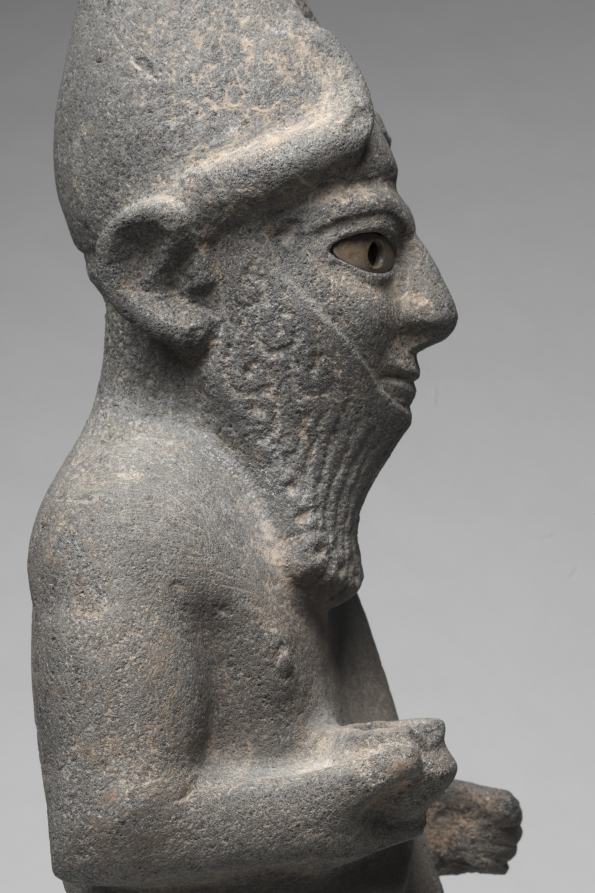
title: Priest-King or Deity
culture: Hittite, North Syria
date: c. 1600 BCE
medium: basalt with bone eyes (left, ancient; right, restored)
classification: Sculpture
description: The Hittites migrated into Anatolia in the 3rd millennium BCE and spoke an Indo-European language, a group that includes Greek, Latin, Persian, Sanskrit, English, and most modern European languages. They were the first ancient people to use iron for weapons. From about 1600–1200 BCE their empire was at its peak, extending from central Anatolia to Syria, and south along the eastern Mediterranean. Their vast empire and interest in commerce enabled the Hittites to spread Mesopotamian ideas and culture throughout the ancient Mediterranean world. This large basalt sculpture is exceptionally rare in depicting a Hittite god or priest-king wearing a horned conical crown, false beard, and long robe. He holds a bowl in his right hand and once held something in his left, perhaps a staff or sword.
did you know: The left eye of the sculpture is the original bone inlay while the right eye is a modern restoration done after the piece was damaged.